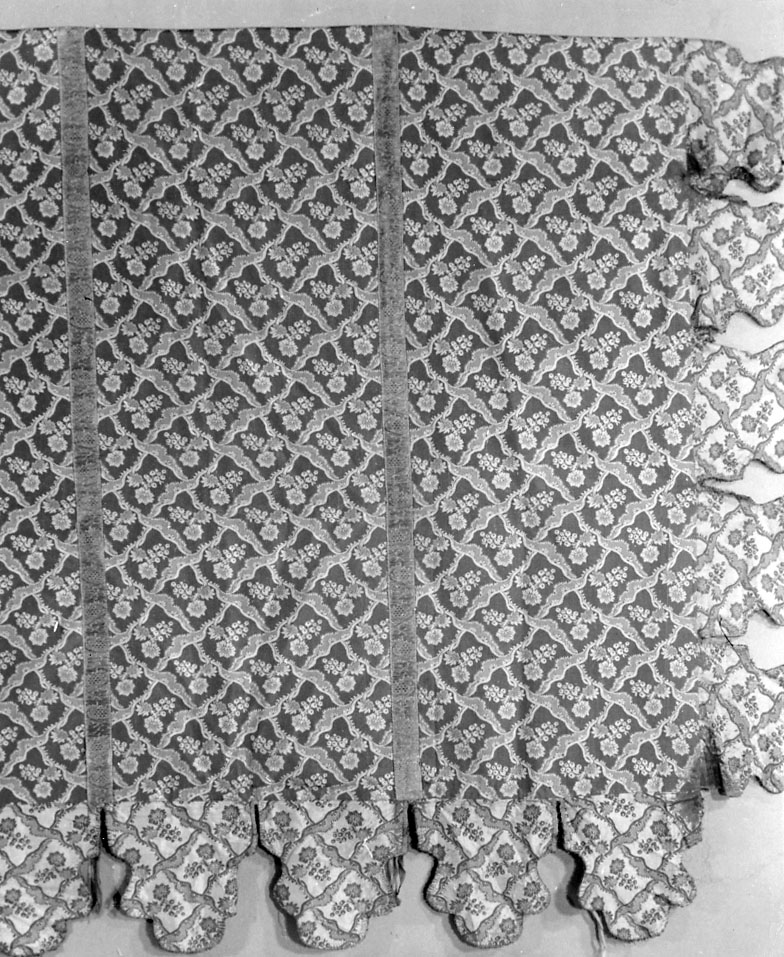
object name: Textile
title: Canopy for a Bed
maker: Spain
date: 18th century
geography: Spain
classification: textile; weaving